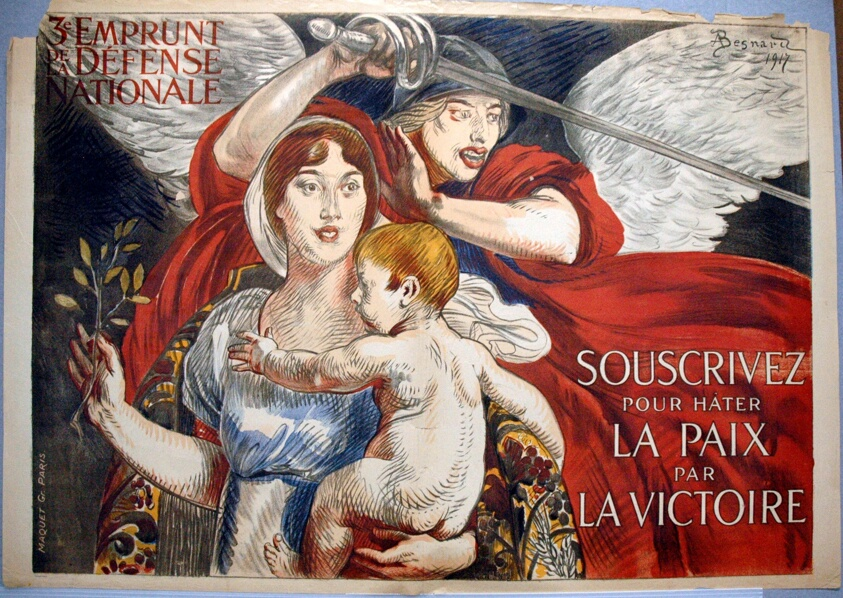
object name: Print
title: Subscribe in Order to Hasten Peace through Victory.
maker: Albert Besnard (French, 1849-1934); Published by Maquet Gr.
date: 1917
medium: Color lithograph on cream wove paper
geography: France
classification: poster; print; prints and drawing